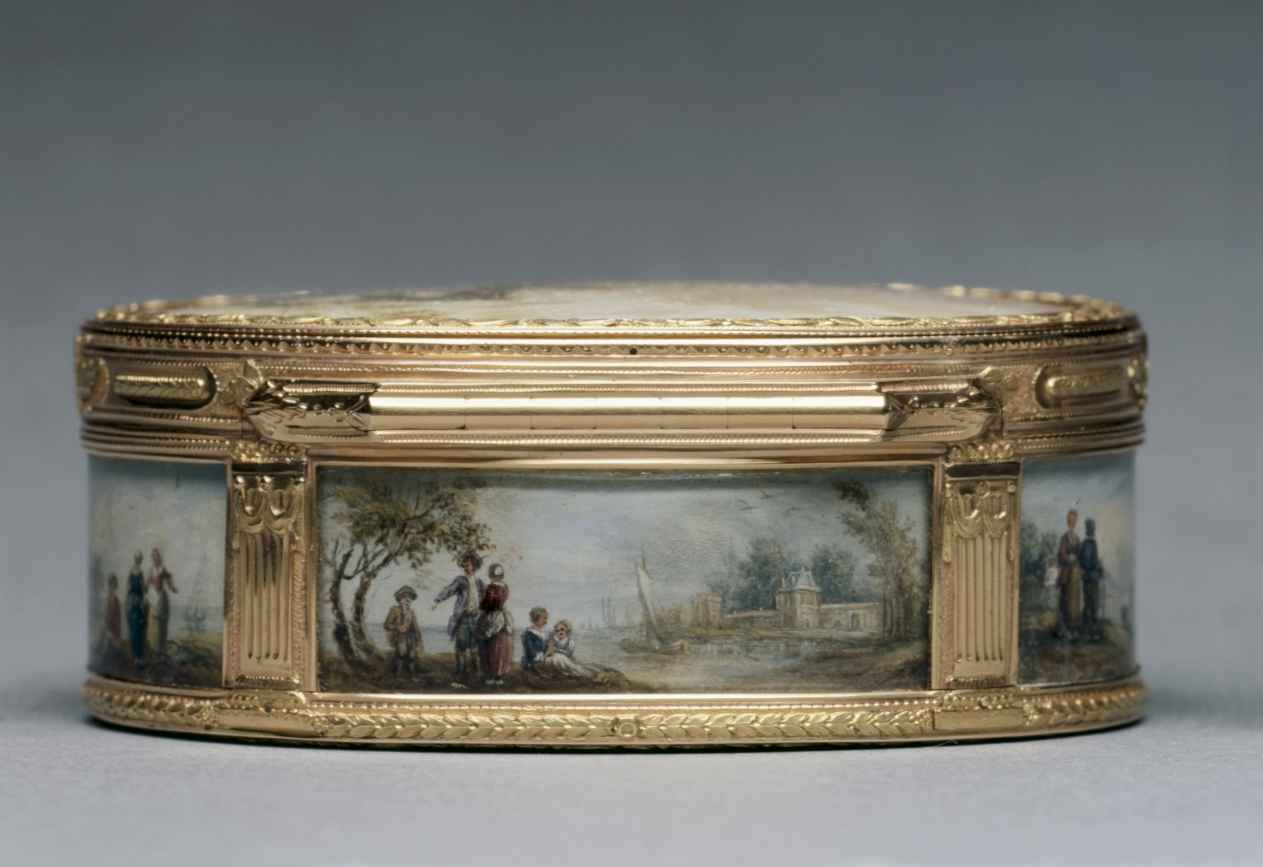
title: Snuff Box (Tabatière)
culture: France, 18th century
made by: Pierre-Nicholas Pleyard (French)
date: 1768–69; 1776–78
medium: gouache miniatures mounted on gold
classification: Metalwork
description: Snuff boxes were highly ornamented functional objects popular among French social elites. They were simultaneously containers for powdered tobacco and a means to communicate social and political status. Often decorated with miniature paintings inspired by popular paintings of the time, the works reproduced on this box are modeled after those of Claude-Joseph Vernet (cover and front panel) and David Teniers the Younger (base, side, and back panels).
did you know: These miniature paintings are mounted à cage, a practice popular in the mid-1700s that involved setting decorated panels into gold frames to create a box’s walls.